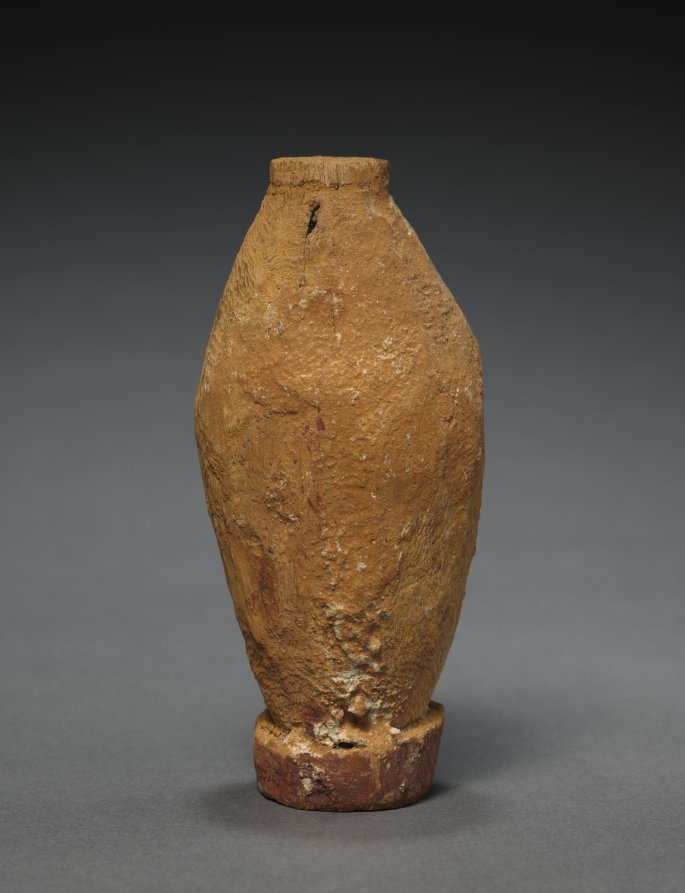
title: Model Storage Vessel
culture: Egypt, Middle Kingdom (2040–1648 BCE), Dynasties 11–12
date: 2000–1900 BCE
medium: painted wood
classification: Funerary Equipment